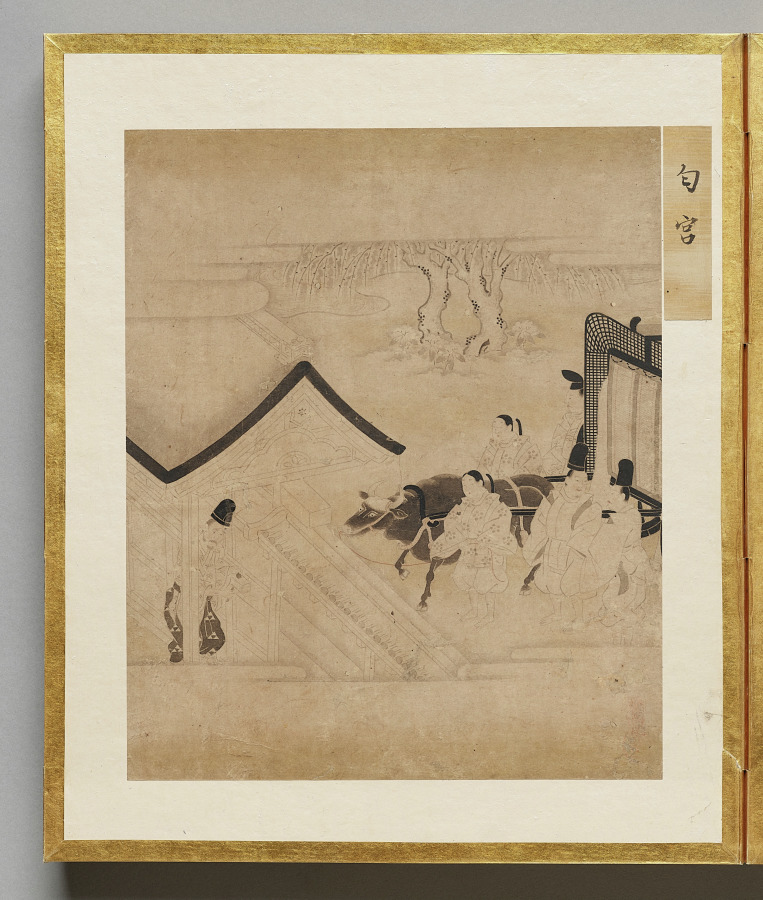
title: His Perfumed Highness from Album of Illustrations for the Tale of Genji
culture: Japan, Edo period (1615–1868)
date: 1600s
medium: painting in an accordion-style album; ink, light color, and gold on paper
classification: Bound Volume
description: This album contains illustrations for the classic literary work the Tale of Genji, authored in the 1000s by Murasaki Shikibu, an aristocrat of the Heian period (794–1185) court. The scenes are painted in the “white drawing” (hakubyō) mode, in which a fine ink line is used to depict figures and spaces with great subtlety, punctuated only occasionally by traces of red pigment for a character’s lips, a detail of a garment, or a decorative element. These two scenes illustrate episodes from the chapters “Thin Veil of Cloud” (Usugumo) and “Barrier Gate” (Sekiya).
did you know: The illustrations are identified by chapter title in cartouches to the upper right of the paintings.